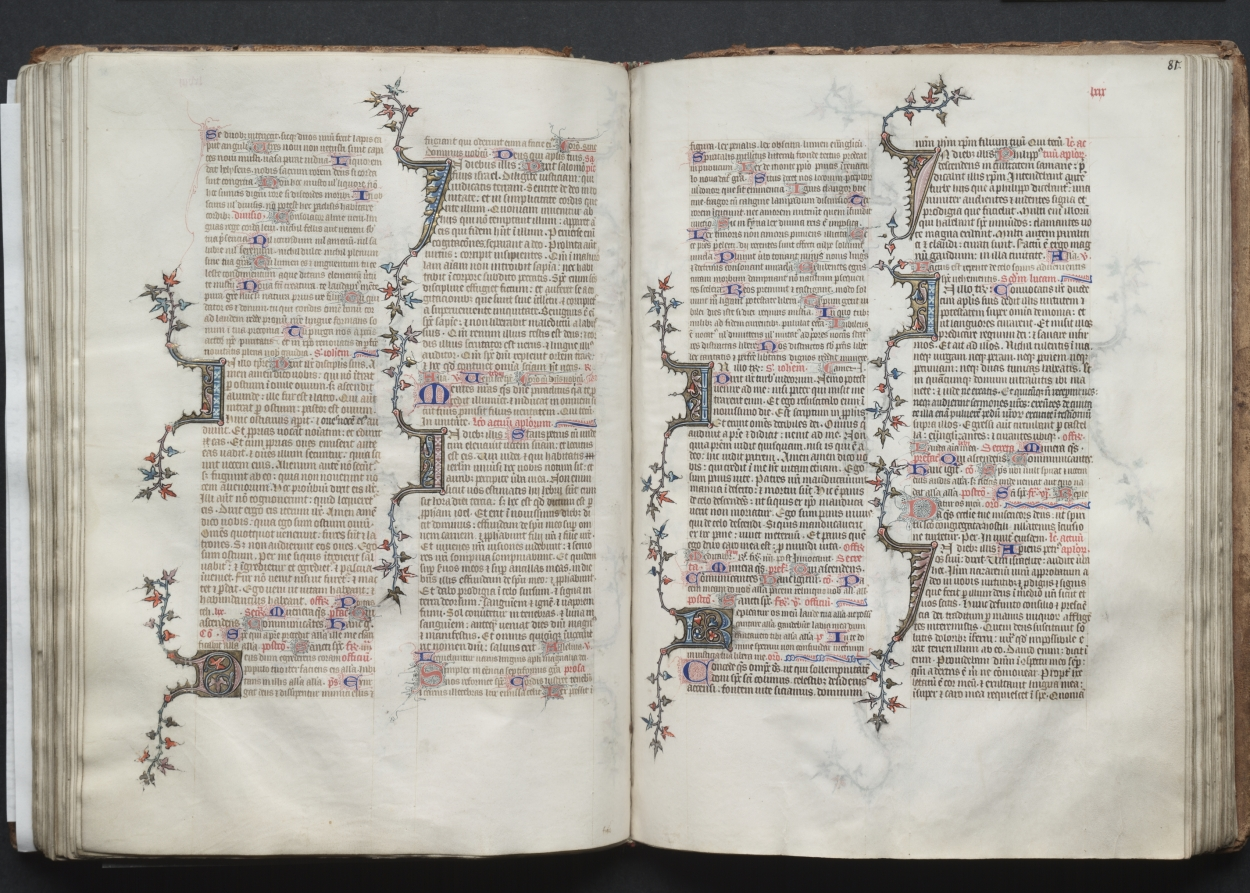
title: The Gotha Missal: Fol. 81r, Text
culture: France, Paris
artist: Master of the Boqueteaux (French)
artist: and Workshop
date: c. 1375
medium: ink, tempera, and gold on vellum; blind-tooled leather binding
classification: Bound Volume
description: The style and quality of this manuscript's decoration is typical of deluxe Parisian books made for aristocratic or royal patrons. Most of the book's decoration appears to be the work of the Master of the Boqueteaux, an artist active at the court of King Charles V (died 1380). His style was apparently shared by a number of book illuminators working in and around Paris. It is very possible that the Gotha Missal belonged to Charles V, but is not provable because the manuscript has no royal portraits and lacks a colophon. Given the book's magnificent decoration, however, it would seem that it was produced for a Valois prince, if not for the king himself. The manuscript receives its name from the German dukes of Gotha, its later owners.